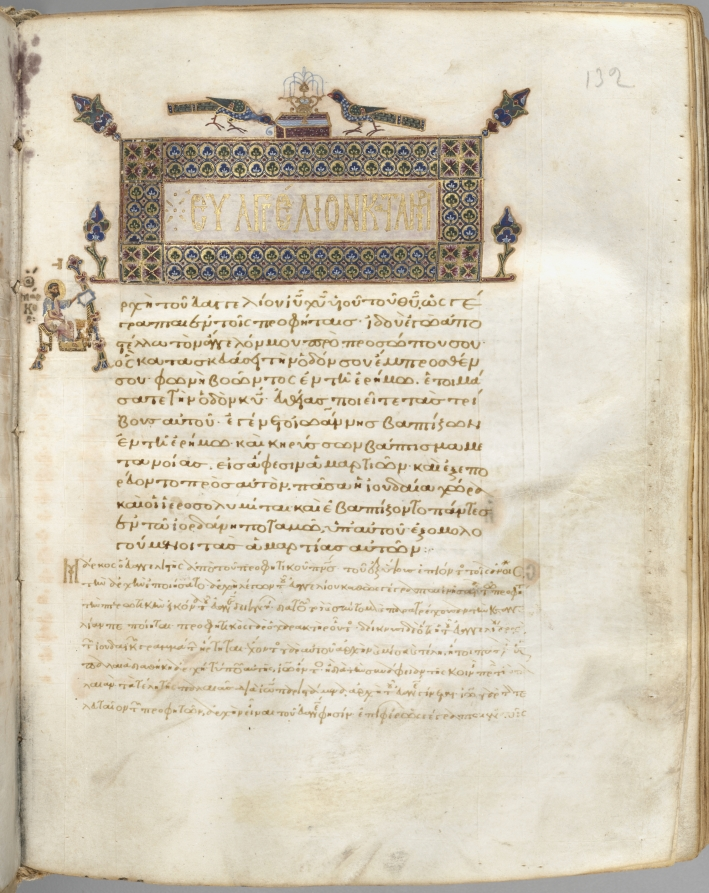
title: Portrait of Mark, folio 132 (recto), from a Gospel Book with Commentaries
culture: Byzantium, Constantinople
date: c. 1000–1100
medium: ink, tempera, and gold on vellum; leather binding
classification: Bound Volume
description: Each of the four gospels in this book opens on a page with brilliantly illuminated borders depicting the author of the text as well as birds-principally peacocks, symbols of the immortality of the soul-and fountains, representing the fountain of life and the salvation of the soul. This volume consists of 428 leaves with texts in Greek. Its level of sophistication suggests that it was probably written and decorated in a monastery in Constantinople.